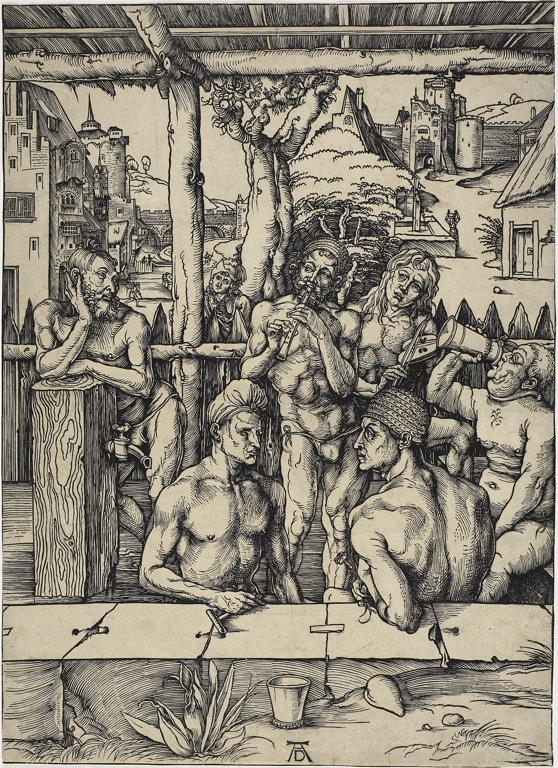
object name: Print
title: The Men's Bath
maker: Albrecht Dürer (German, 1471-1528)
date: 1496/97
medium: Woodcut in black on buff laid paper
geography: Germany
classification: woodcut; print; prints and drawing; paper